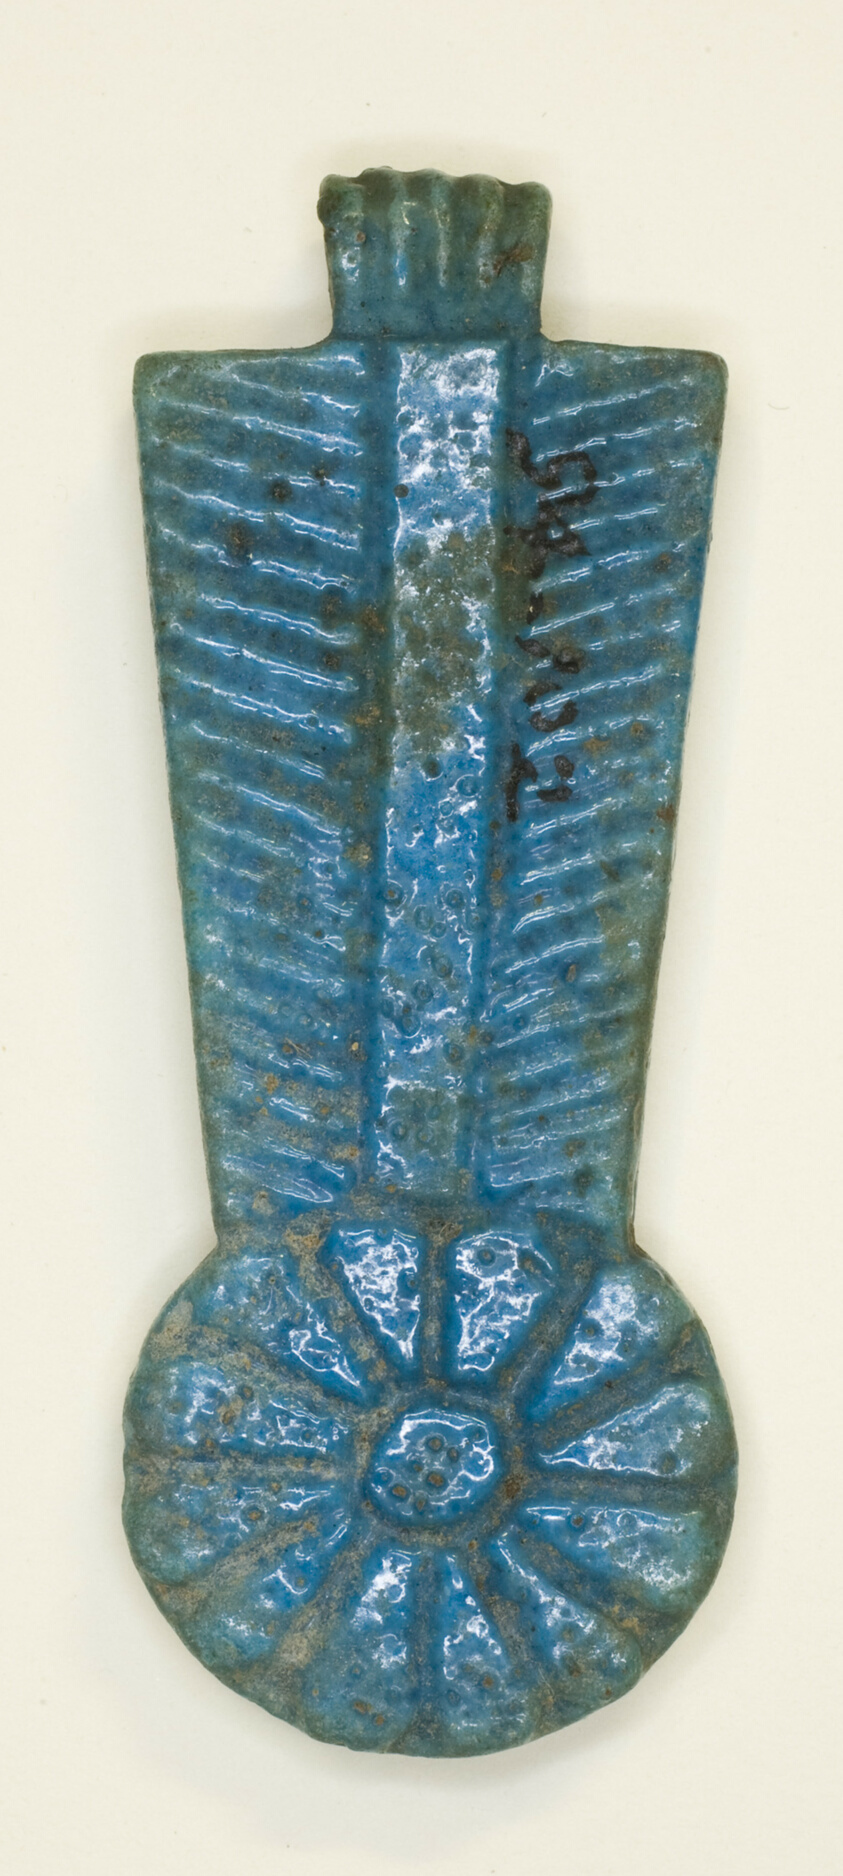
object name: Costume and Accessories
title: Amulet of a Necklace Counter Weight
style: third intermediate period, egyptian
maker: Egyptian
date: Third Intermediate Period, Dynasty 21–25 (1070–656 BCE)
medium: Faience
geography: Egypt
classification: amulet; jewelry; ceramics; ancient art; costume; faïence (composite material)